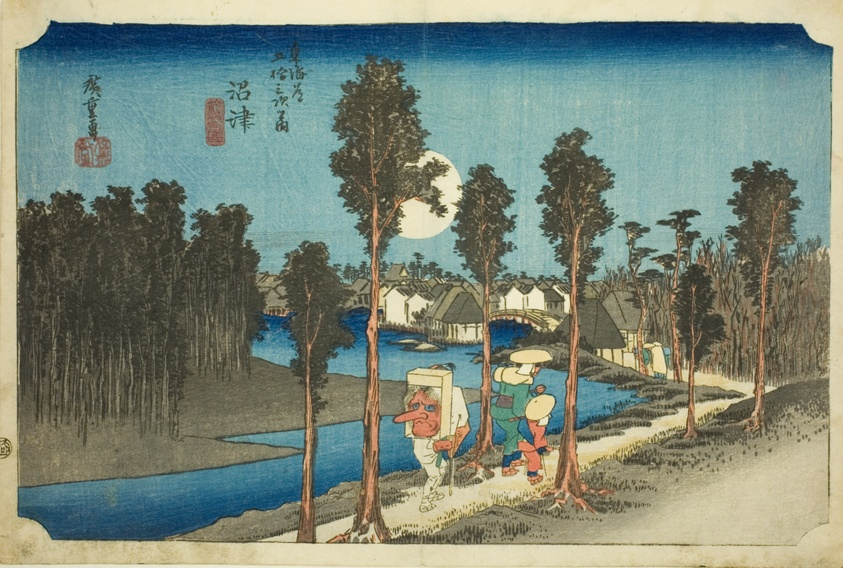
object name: Print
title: Numazu—Dusk (Numazu—tasogare zu), from the series The Fifty-Three Stations of the Tōkaidō Road (Tōkaidō gojūsan tsugi no uchi)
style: Japanese (culture or style)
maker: Utagawa Hiroshige 歌川 広重; Japanese, 1797-1858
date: 1831-34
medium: Color woodblock print; ōban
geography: Japan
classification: woodblock print; print; asian art